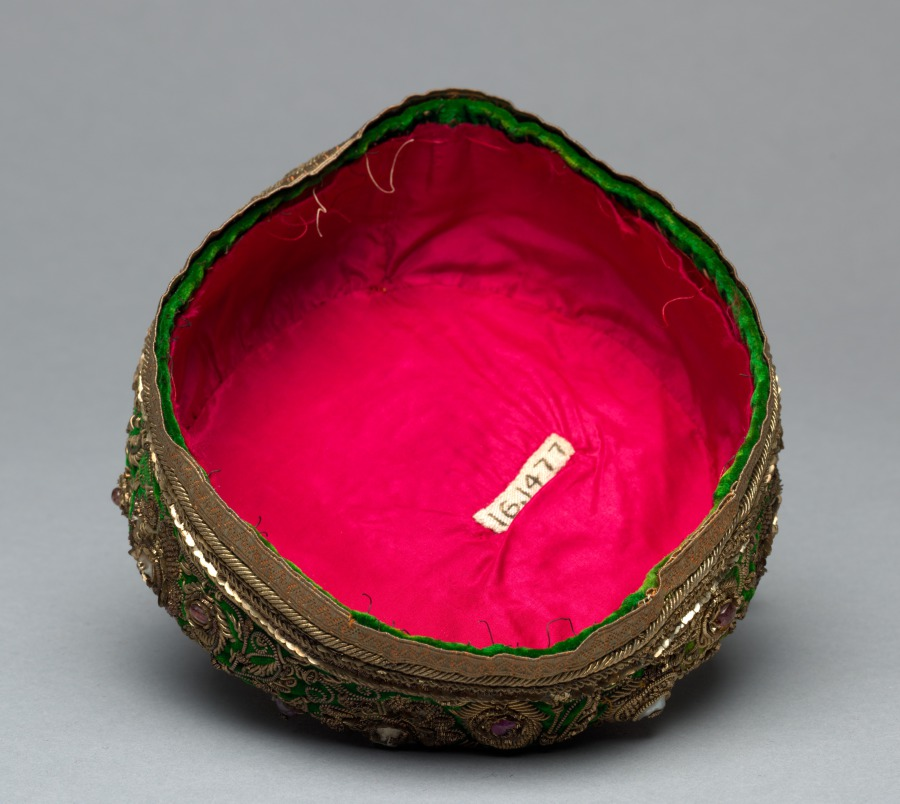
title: Cap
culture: India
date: 1800s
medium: Velvet embroidered with gilt-silver–wrapped silk thread (zari); silk: lining; rubies, pearls, and spinels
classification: Garment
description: Historically in India, head coverings were worn in outdoor and formal contexts and can signal age, allegiance, and status among Indian men and boys. A low round cap such as this was worn primarily by the well-educated aristocratic boys in the king’s circle. The painstaking process of creating the ornament involved wrapping gilt-silver wire of various dimensions around a silk thread core to create a textured appearance for the flowers and vines.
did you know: The semiprecious rose-colored spinels were considered a talisman for military victory.